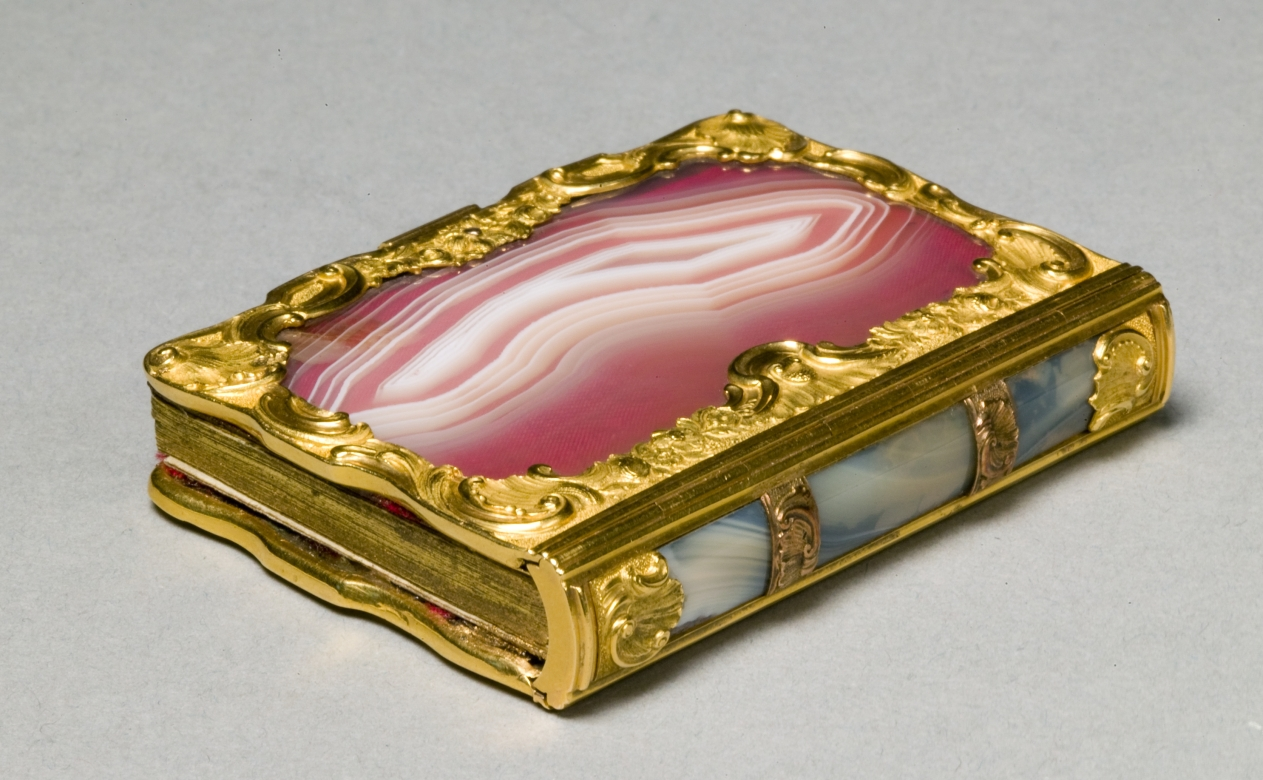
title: Almanac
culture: England, early 19th century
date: 1818–1830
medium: agate and gold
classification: Miscellaneous